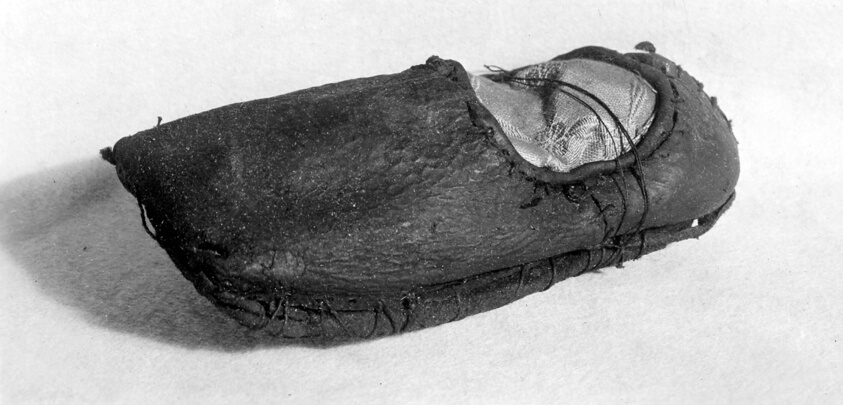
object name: Costume and Accessories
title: Child's Shoe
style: elizabethan, tudor, european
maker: England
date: 16th century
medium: Leather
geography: England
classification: textile; costume accessory - shoe; shoes - misc; costume; dress (garment); clothing